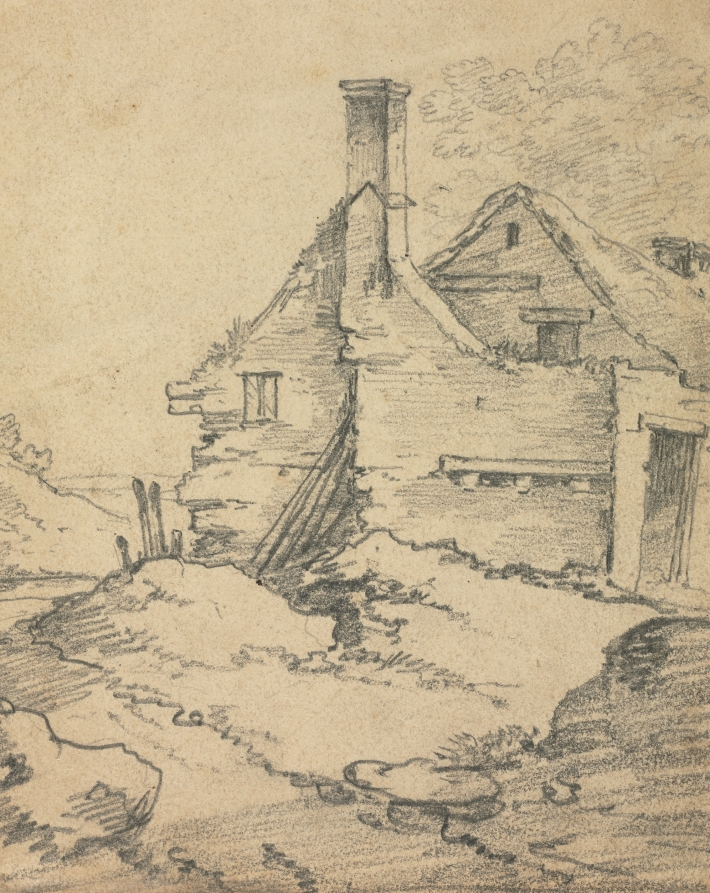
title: Houses in a Landscape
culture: England, 19th century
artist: Benjamin Barker (British, 1776–1838)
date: c. 1796–1838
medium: graphite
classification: Drawing